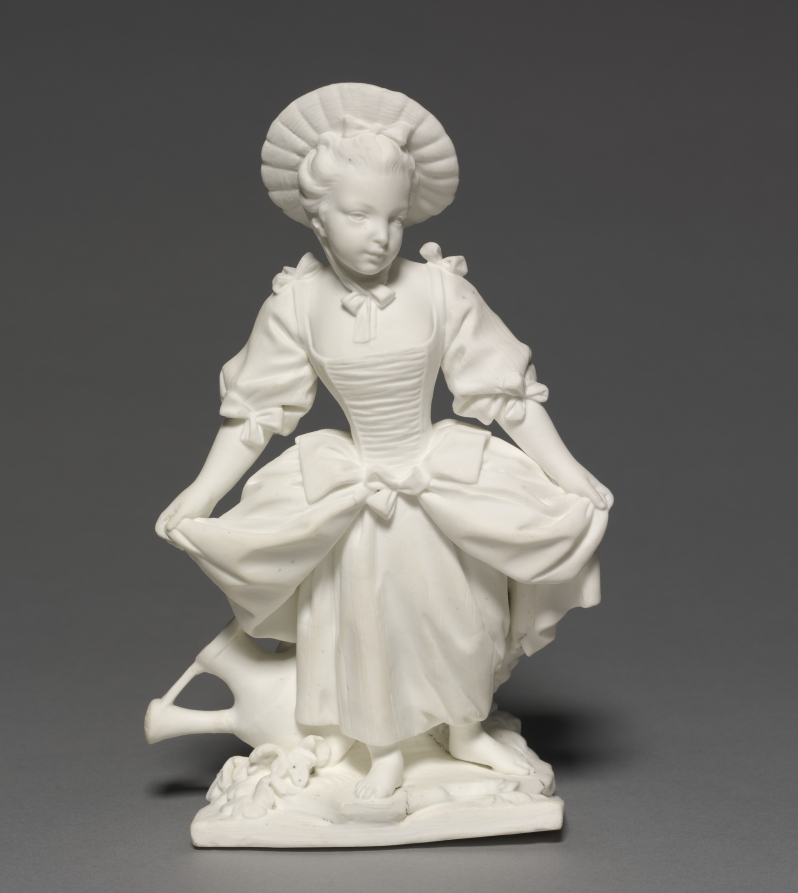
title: Figure of the Dancer (La Danseuse)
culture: France, Vincennes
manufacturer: Vincennes Porcelain Factory (France, 1740–56)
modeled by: Pierre Blondeau (French)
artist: after a design by François Boucher (French, 1703–1770)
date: 1748–52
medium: unglazed soft-paste porcelain (biscuit porcelain)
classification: Ceramic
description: Although a few Vincennes porcelain figures exist which are glazed, the royal factory adopted at an early date the practice of producing unglazed, biscuit figures which, because of the purity of their material, resemble marble figurines. The fashion for biscuit figures first introduced at Vincennes quickly spread through Europe.